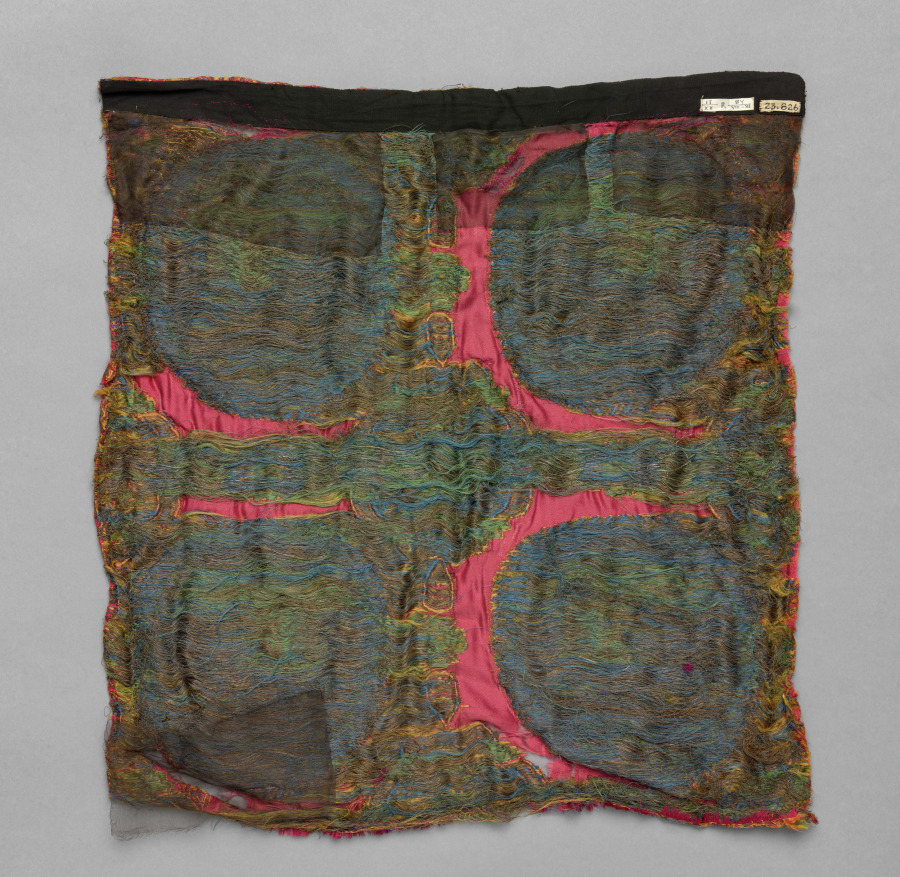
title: Modern Reproduction of Iranian Brocade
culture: Italy, late 19th century-early 20th century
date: late 1800s–before 1923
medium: compound weave, silk(?)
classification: Textile